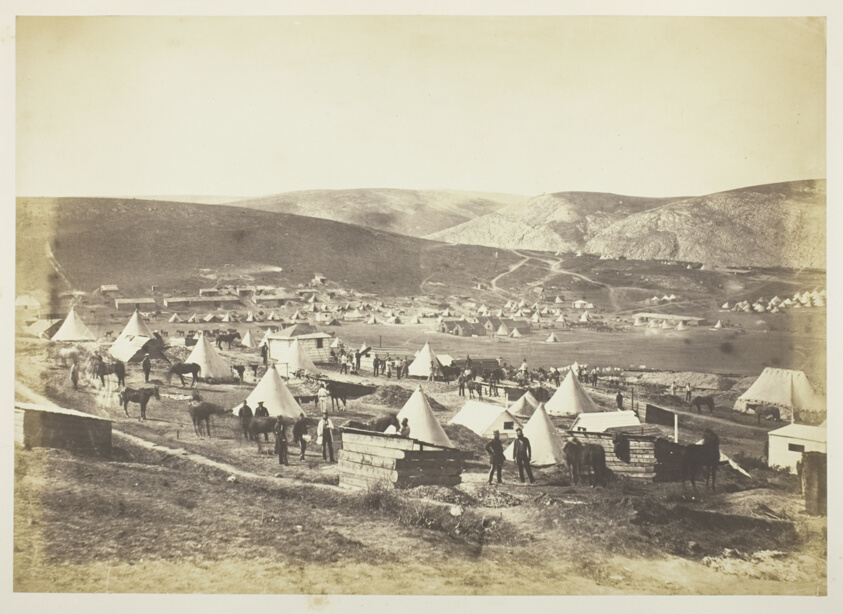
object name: Photograph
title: Camp of the 5th Dragoon Guards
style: 19th century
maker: Roger Fenton (English, 1819–1869)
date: 1855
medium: Salted paper print, plate 14 from the album "Photographs Taken in the Crimea" (1856)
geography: England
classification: salted paper print; photographic process; photography; photograph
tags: Collected by Hugh Edwards, Crimea 1856